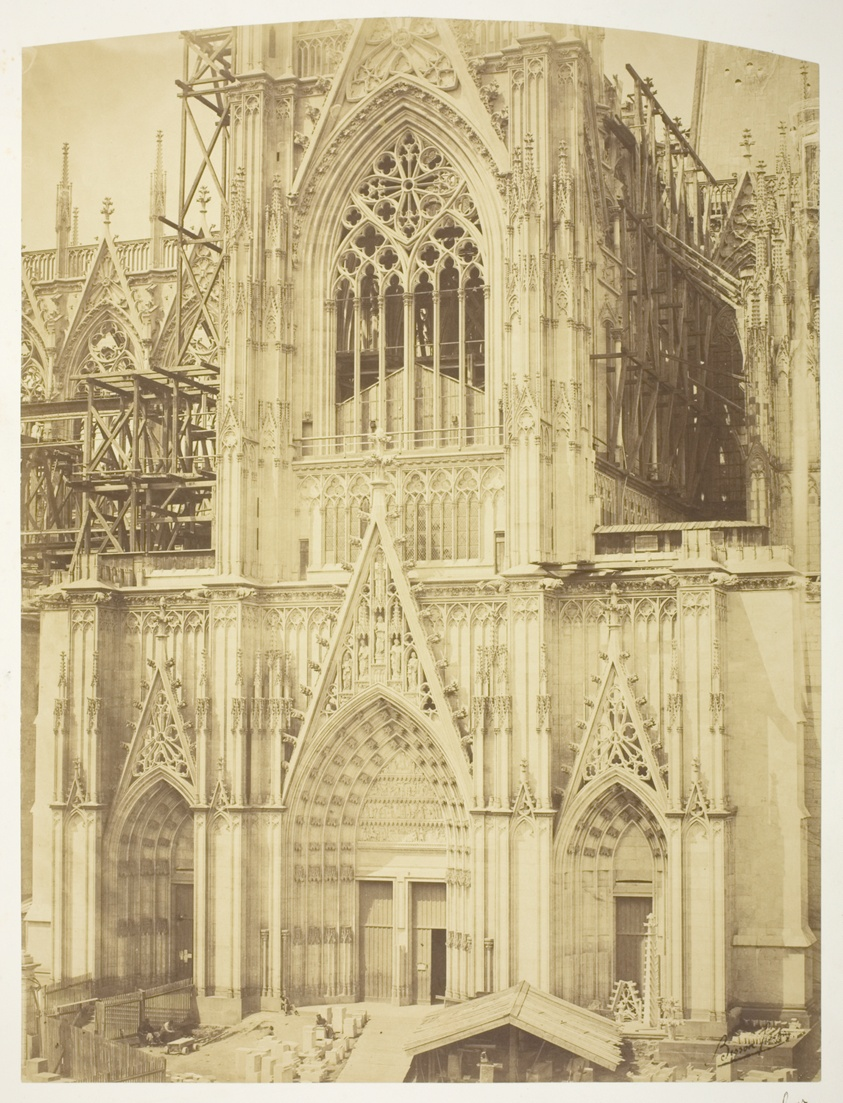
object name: Photograph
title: Cologne Cathedral, South Transept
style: 19th century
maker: Bisson Frères (Louis-Auguste Bisson, French, 1814–1876 and; Auguste-Rosalie Bisson, French, 1826–1900)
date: 1854, printed 1854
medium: Albumen print, from the album "Reproductions photographiques des plus beaux types d’architecture et de sculpture"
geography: France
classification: albumen silver print; photographic process; photography; photograph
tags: Collected by Hugh Edwards, architecture